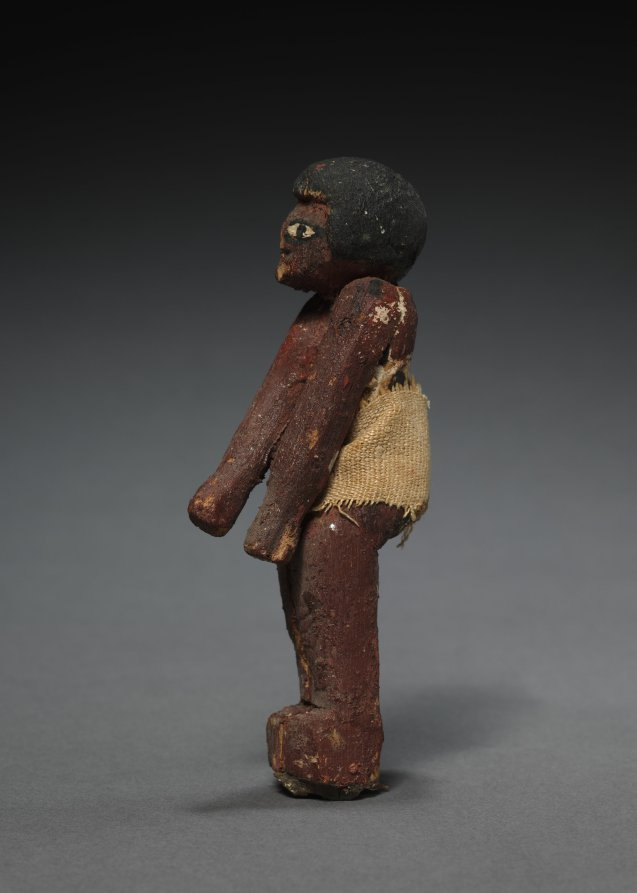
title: Seated Model Sailor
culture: Egypt, Middle Kingdom (2040–1648 BCE), Dynasties 11–12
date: c. 2000–1000 BCE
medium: painted sycamore fig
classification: Funerary Equipment